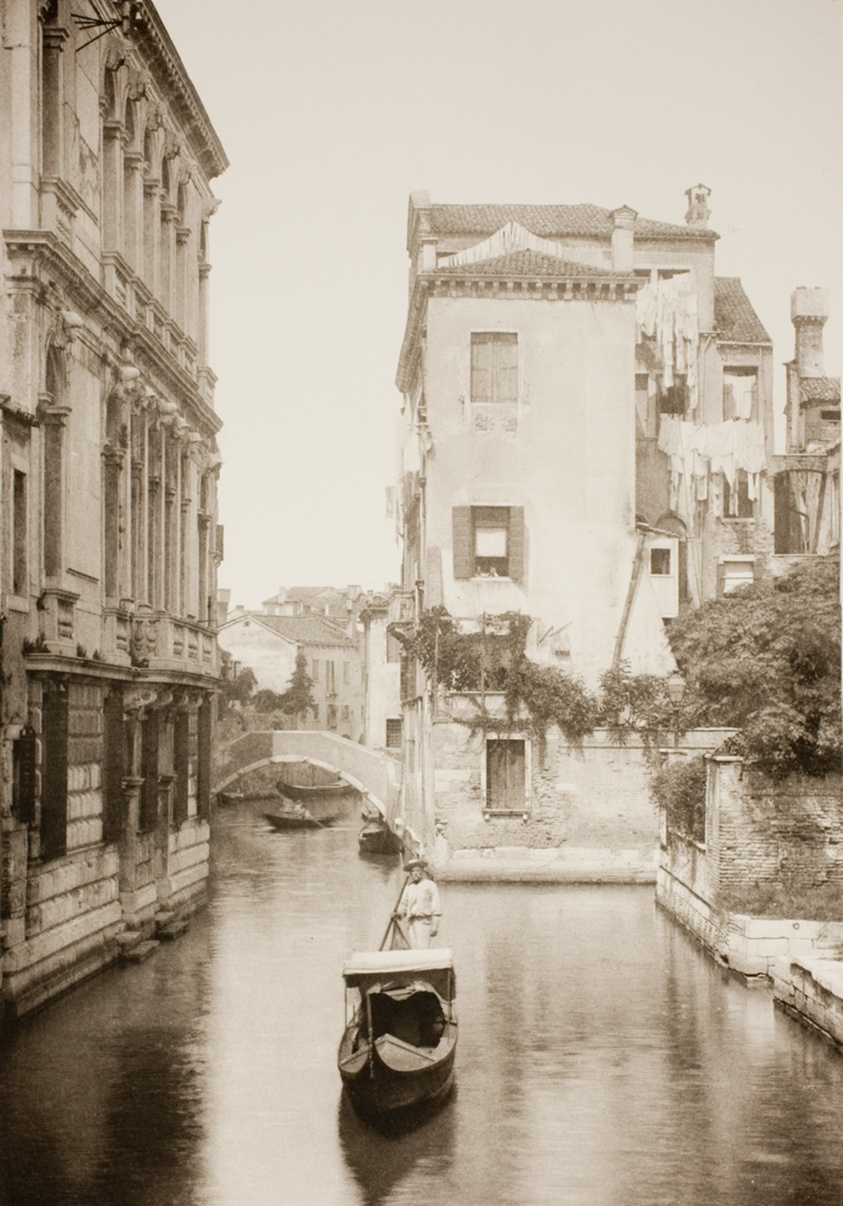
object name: Photograph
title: Untitled (II 8)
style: 19th century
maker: edited by Ferdinando Ongania; Italian, 1842–1911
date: c. 1890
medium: Photogravure, No. II 8 from the portfolio "Calli, Canali e Isole della Laguna"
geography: Italy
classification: photograph; photography